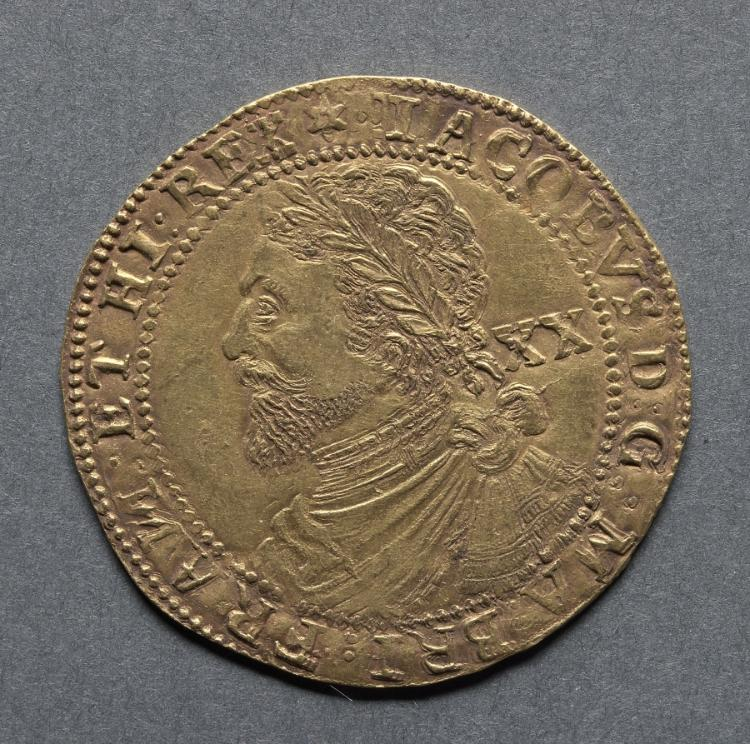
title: Laurel: James I (obverse)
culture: England, James I, 1603-1625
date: 1619–1620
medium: gold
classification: Coins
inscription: IACOBVS D:G: MAG: BRI: FRA:ET HIB: REX, XX